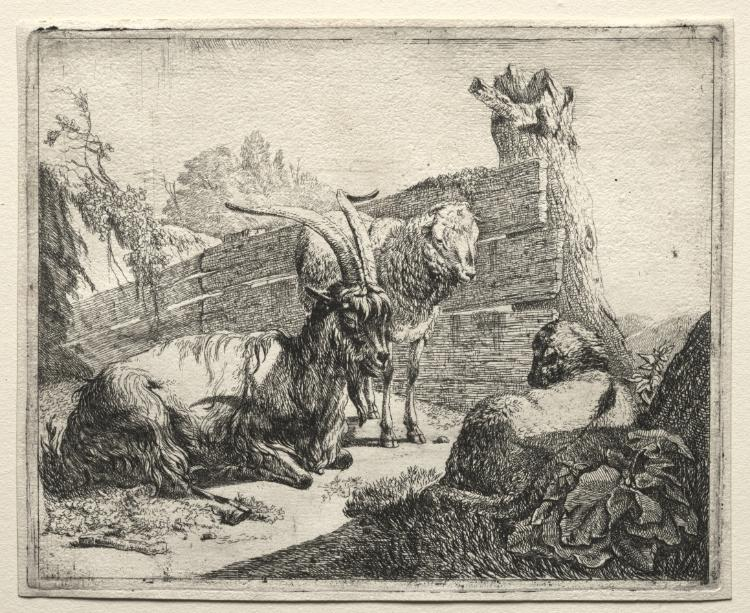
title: The Hedgerow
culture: Germany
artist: Johann Heinrich Roos (German, 1631–1685)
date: 1665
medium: etching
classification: Print